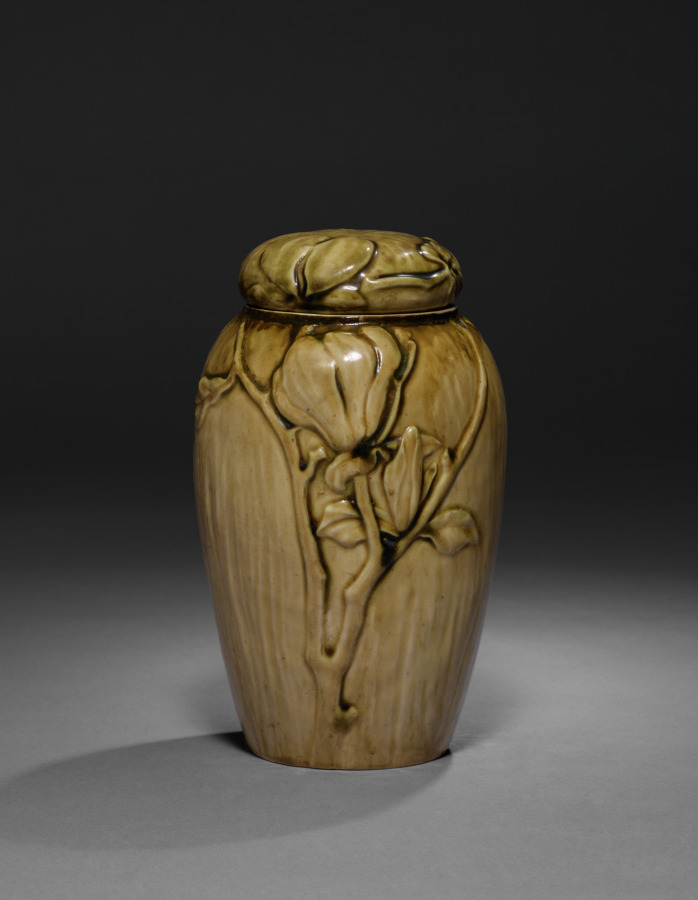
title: Magnolia Ginger Jar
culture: America, New York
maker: Tiffany Studios (United States, New York, 1902–32)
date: c. 1904–14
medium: glazed white clay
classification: Ceramic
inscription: LCT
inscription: Tiffany Favrile Pottery P413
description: By 1900 Louis Comfort Tiffany had expanded his empire by increasing the firm’s production of “fancy goods,” including inkstands, candlesticks, clocks, small boxes, desk sets, tea screens, and other functional objects. Along with the array of artistic glass designs from his factory in Corona, Queens, works in ceramic, bronze, other metals, and even jewelry abounded. These affordable luxury items were designed with as much thought to artistry as the great stained glass windows and lamps through which the firm enjoyed unrivaled success.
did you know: Ceramic works were Louis Comfort Tiffany's contribution to the art pottery movement of the early 1900s.